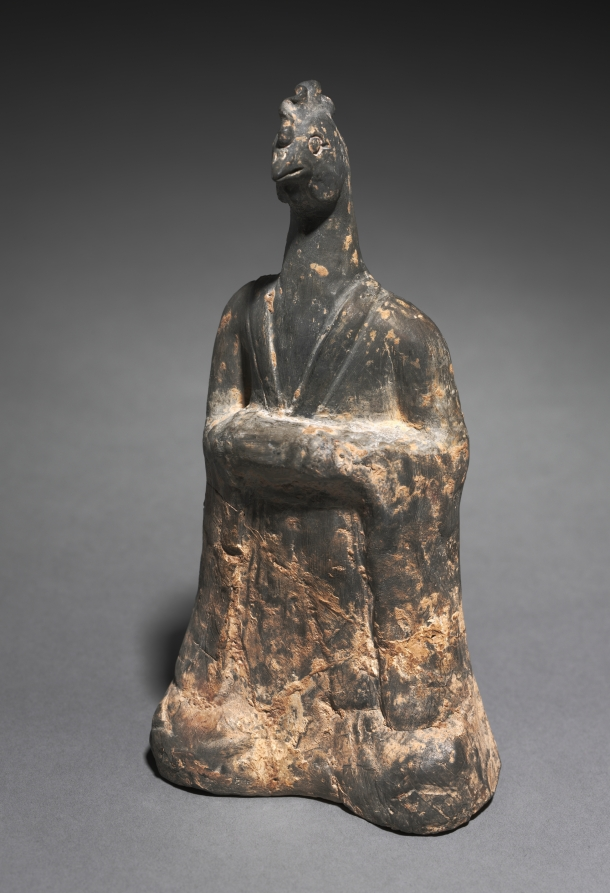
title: Mortuary Figure of the Zodiac Sign: Cock (Capricorn)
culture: China, Northern Wei dynasty (386-534)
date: 500s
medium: gray earthenware with traces of slip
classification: Sculpture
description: The twelve-animal zodiac series—rat, ox, tiger, rabbit, dragon, snake, horse, goat, monkey, rooster, dog, and boar—signifies a traditional Chinese concept of time structured in a cyclical order. The twelve animals are also linked to the art of fortune-telling that underlies human existence in connection with the changes of the universe. The use of the twelve zodiac animals as tomb furniture suggests they provided a cosmological structure for the afterlife.